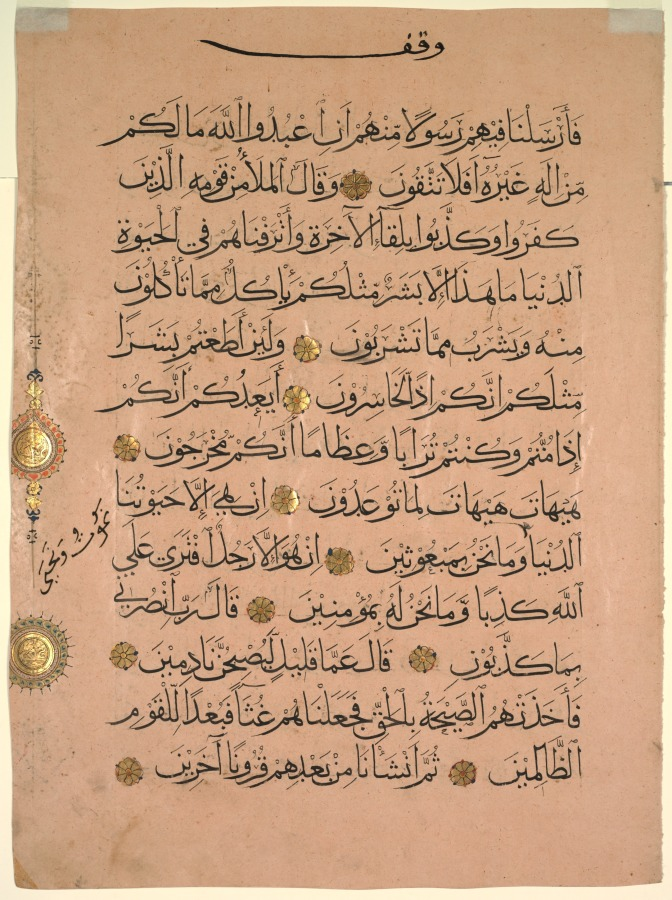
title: Leaf from a Qur'an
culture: Egypt, Cairo, Mamluk Sultanate (1250–1517)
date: 1300s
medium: ink, gold, color on pink paper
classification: Manuscript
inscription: 13 lines of muhaqqa script; waqf inscription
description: It is through the Arabic language that the Qur’an was revealed to the Prophet Muhammad in the 600s. As a result, calligraphy is celebrated as the highest form in Islamic art. This page shows 13 lines from the Qur’an in muhaqqa script, one of the six main script types of Arabic calligraphy. The Qur’an’s importance explains the significance of calligraphy; however, the latter was not restricted to just religious texts. Many objects in the Islamic art gallery bear calligraphic inscriptions and come from secular contexts, displaying the versatility and creativity of this art form.